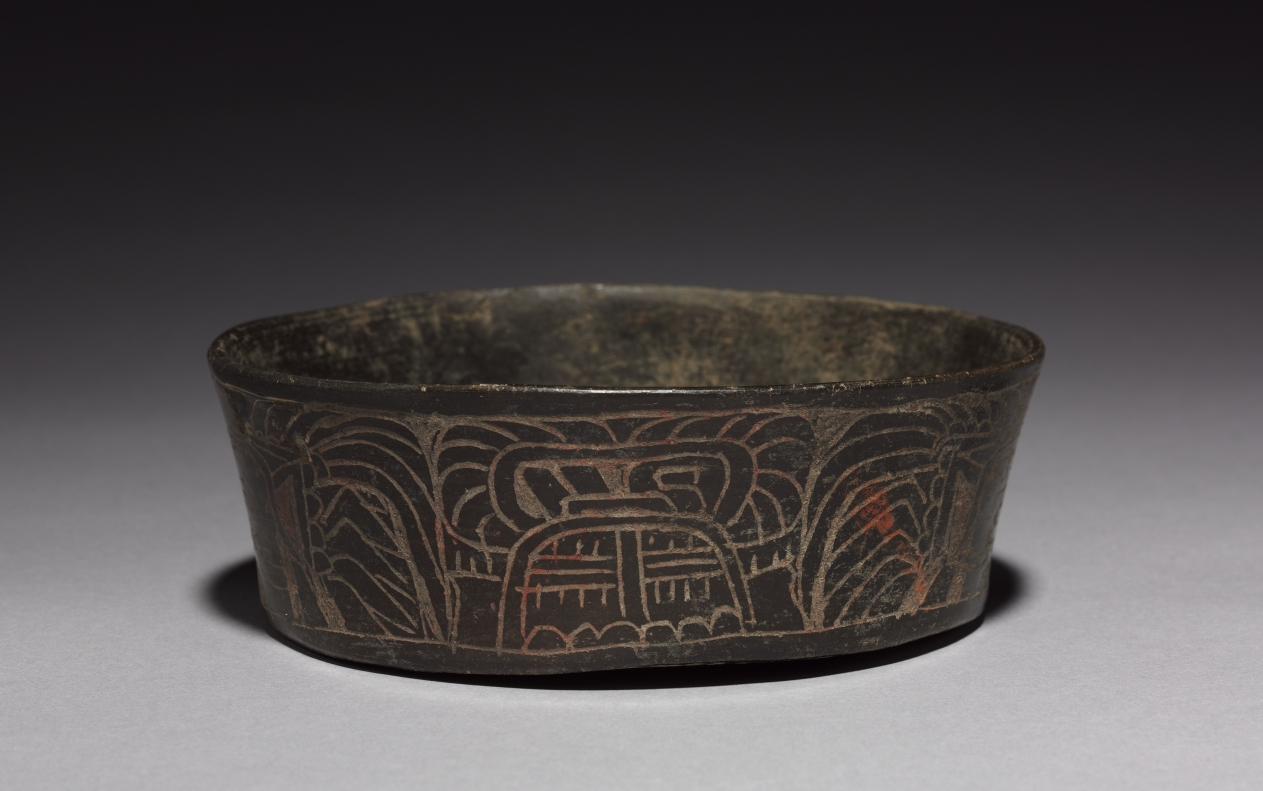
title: Bowl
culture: Central Mexico, Teotihuacán, Classic period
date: 1–550 CE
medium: ceramic, pigment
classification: Stone